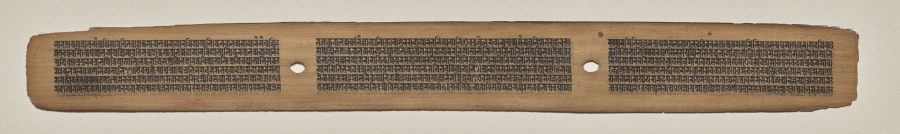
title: Text, Folio 9 (recto), from a Manuscript of the Perfection of Wisdom in Eight Thousand Lines (Ashtasahasrika Prajnaparamita-sutra)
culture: Eastern India, Bihar, Vikramashila Monastery Paintings: Nepal, Kathmandu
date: Sunday, September 14, 1119 (year 239 of the Newar Samvat in the month of Ashvina)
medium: gum tempera and ink on palm leaves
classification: Painting